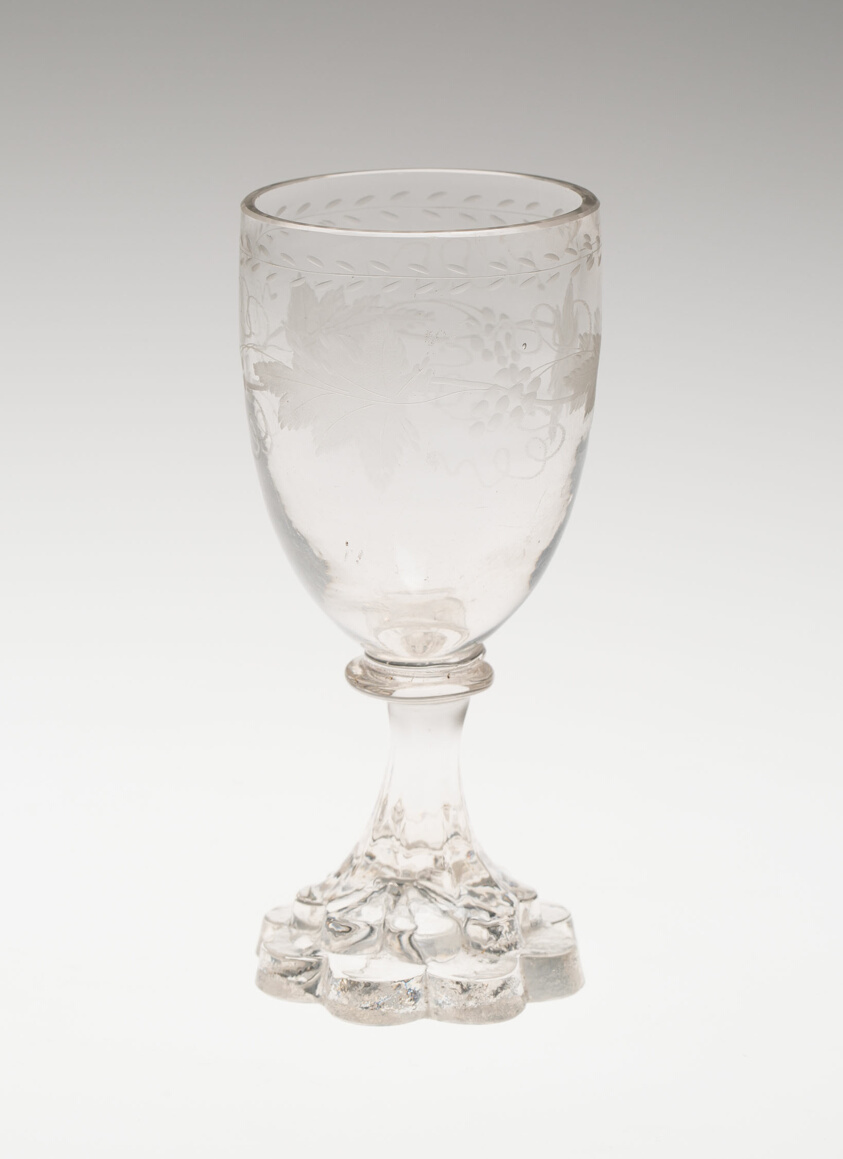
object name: Glass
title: Wine Glass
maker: England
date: 1800/50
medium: Glass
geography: England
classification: drinking vessel; glass